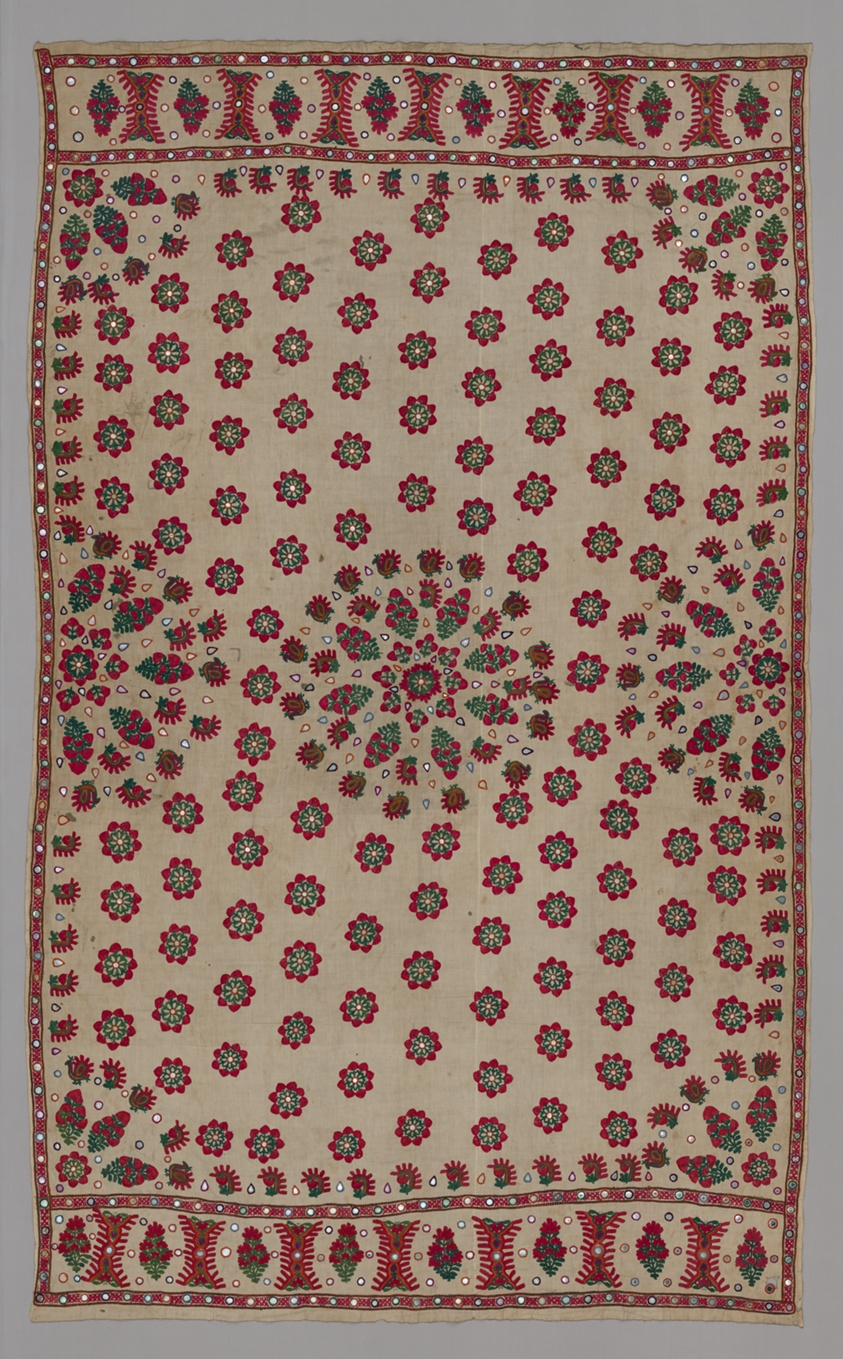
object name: Textile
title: Cover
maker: Eastern India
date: 19th century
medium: Silk; embroidered in ladder, buttonhole stitched interlaced on herringbone and inset with tiny mirrors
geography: India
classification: textile; weaving; needlework (visual works)